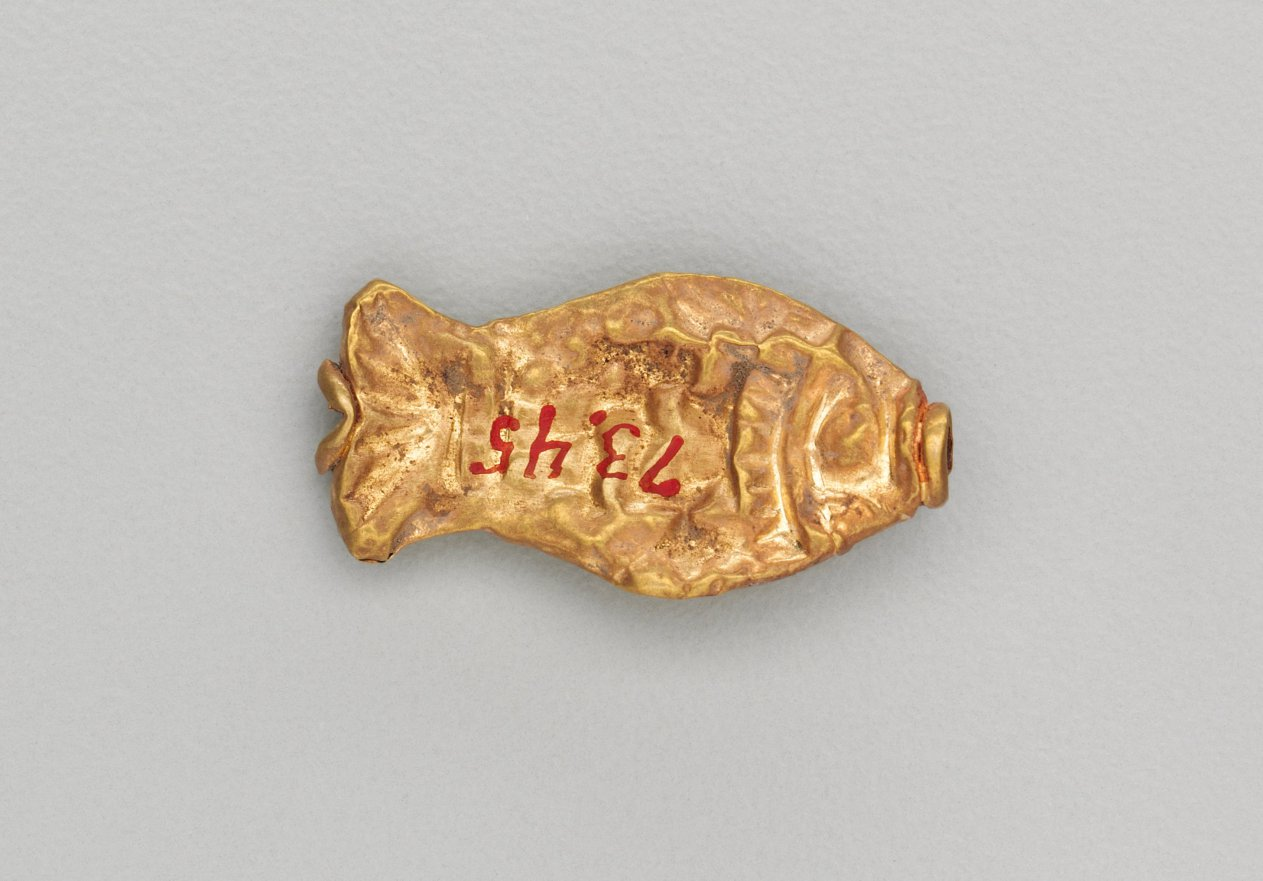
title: Necklace Bead in the Form of a Fish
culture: India, Shunga period (185–78 BCE)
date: 185–72 BCE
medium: gold repoussé with granulation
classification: Jewelry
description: Jewelry in ancient India often consisted of elements associated with water, such as fish and other aquatic plants and animals. Since water is essential for life, imagery that connotes water is life-affirming, or auspicious, and therefore appropriate adornment.